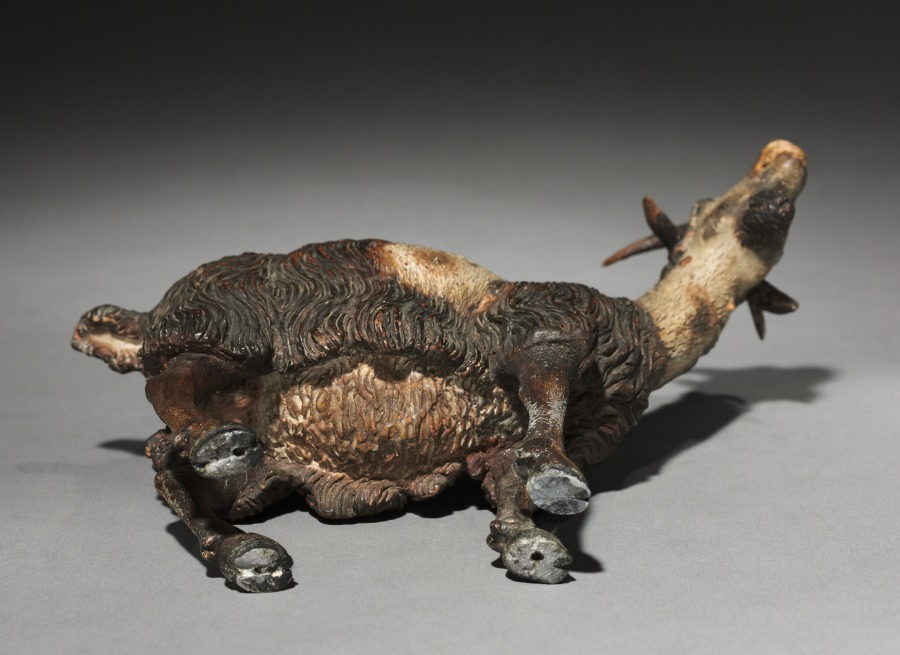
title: Figure from a Crèche: Standing Mountain Goat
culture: Italy, Naples, late 18th-early 19th century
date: 1780–1830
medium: painted wood and terracotta with various textiles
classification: Sculpture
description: The practice of creating scenes of the Nativity for the home dates from the early 1700s in Italy, where people began to set up doll-like figures of about a foot or less in height. The custom was particularly popular in Naples around 1800, where crèche scenes (crèche means cradle, or crib) included many figures, whose heads and hands of painted terracotta, stuffed cloth bodies, and clothing adapted from contemporary local costumes gave them an amazingly realistic character. Representations of the birth of Jesus can be traced to the first few centuries of Christianity. Both living creatures and sculptural depictions of them were used from early times. By the late middle ages it was customary to create life-size figures of wood or stone, naturalistically painted, to represent the characters who participated in the events of Jesus's early life. These sculptures were then arranged in scenes illustrating one or both of the most important of these events, the Adoration of the Shepherds and the Adoration of the Magi-the three kings from the East who came to pay homage to the Christ child. Used in churches, these large figures were especially popular in Italy, Central Europe, Spain, and Portugal. This Object in Focus presentation was organized by Henry Hawley, Curator of Renaissance and Later Decorative Arts and Sculpture.